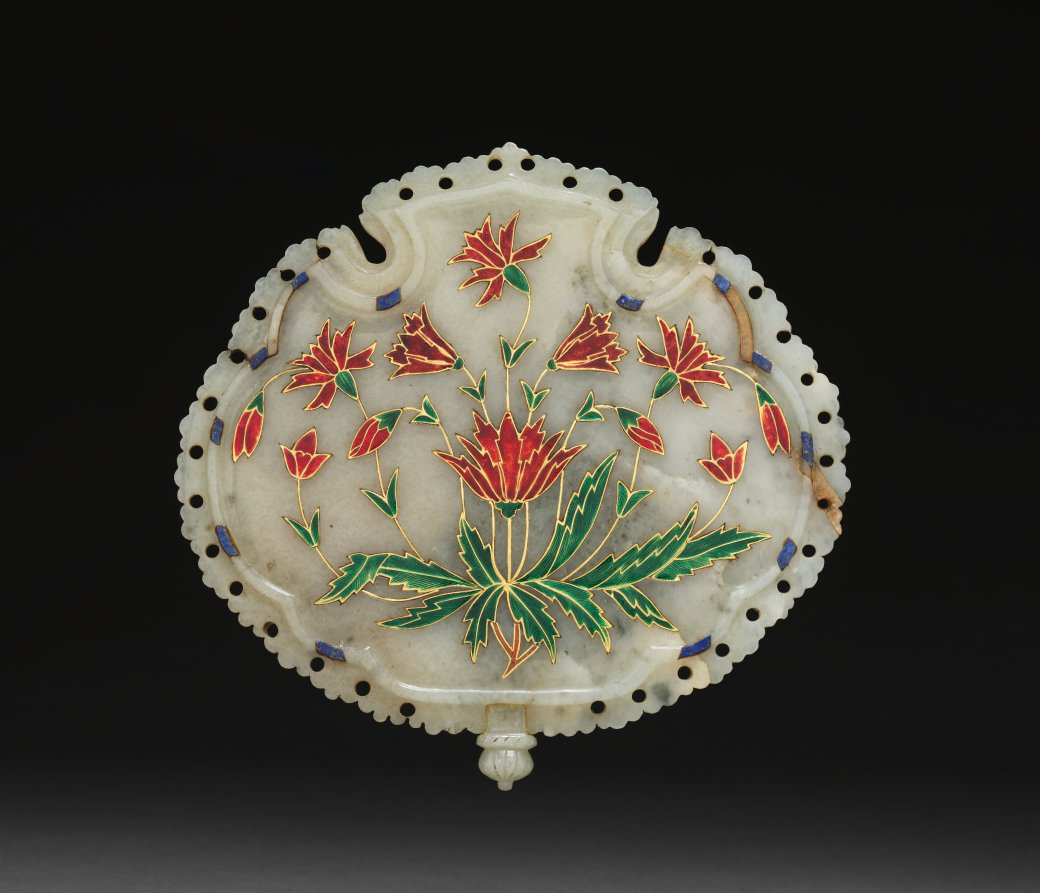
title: Mirror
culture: India, Mughal dynasty (1526-1756)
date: early 18th Century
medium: jade with gold and enamel inlay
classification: Jade